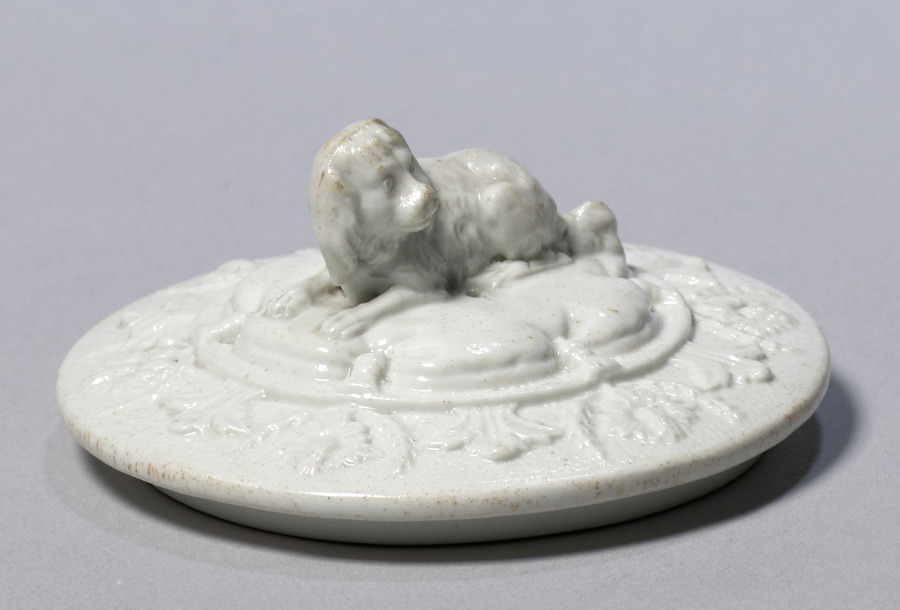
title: Teapot (lid)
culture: England, Staffordshire, 19th century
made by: Wedgwood Factory (British)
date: c. 1830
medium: stoneware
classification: Ceramic